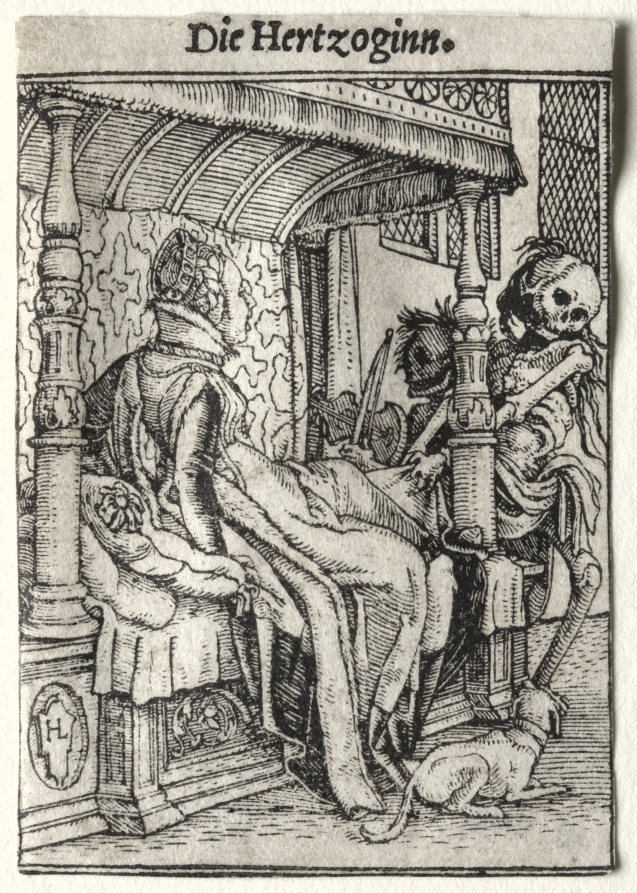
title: Dance of Death: The Duchess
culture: Germany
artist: Hans Holbein the Younger (German, active England and Switzerland, 1497/98–1543)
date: c. 1526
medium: woodcut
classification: Print